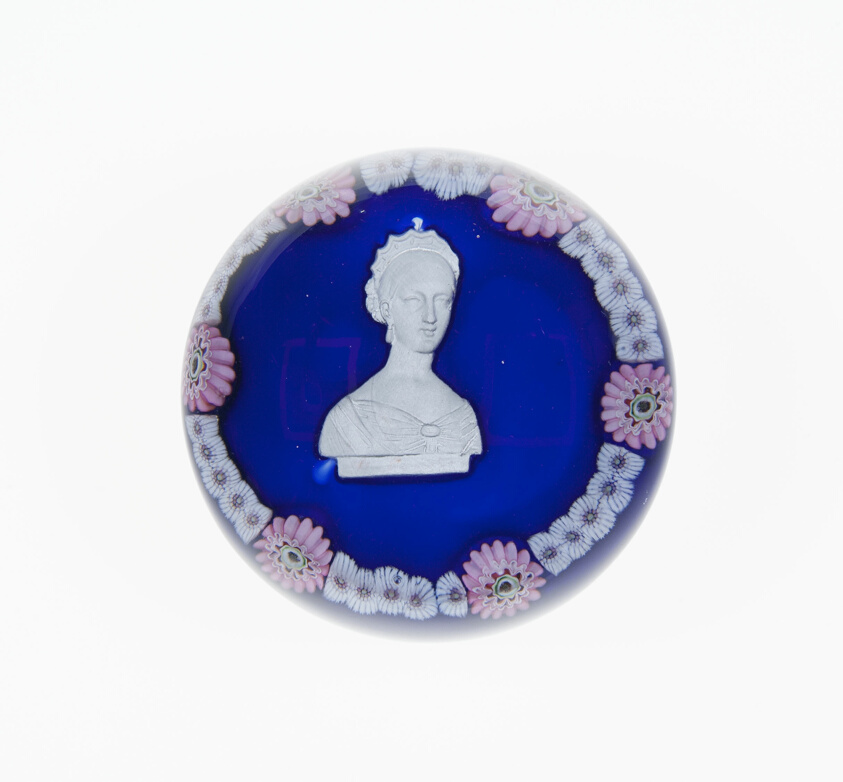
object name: Glass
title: Paperweight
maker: Clichy Glassworks (Cristalleries de Clichy); Clichy, France, 1837-1885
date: c. 1846–55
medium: Glass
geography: Clichy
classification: paperweight; sulphide (glass); european decorative arts; glass